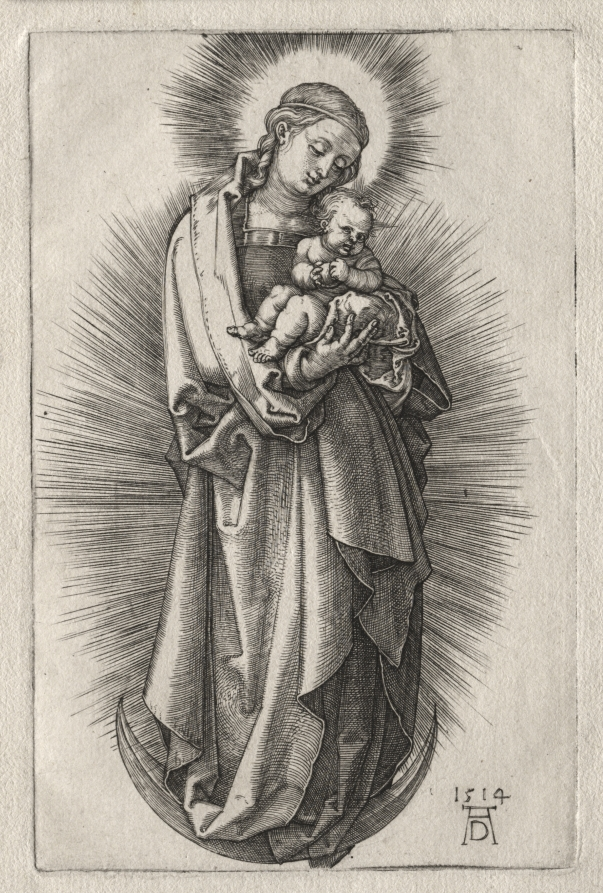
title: The Virgin with Hairband on a Crescent Moon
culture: Germany, late 15th-early 16th century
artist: Albrecht Dürer (German, 1471–1528)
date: 1508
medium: engraving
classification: Print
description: Dürer made four engravings of the Virgin and Child standing on a crescent moon. These devotional images link the Madonna with the pregnant woman of the apocalypse from chapter 12 of the Book of Revelation. The verse says that "a woman clothed with the sun, and the moon under her feet, and on her head a crown of twelve stars . . . " appeared in heaven, delivering a son to conquer Satan—a prefiguration of Christ. In direct contrast with the crowned Virgin (1934.334), whose double aureole shines extravagantly around her figure, Dürer conceived the Madonna (1958.116) with simplicity and humility. In each he presents the dual roles of the Virgin as the Queen of Heaven and as the humble mother of Jesus.